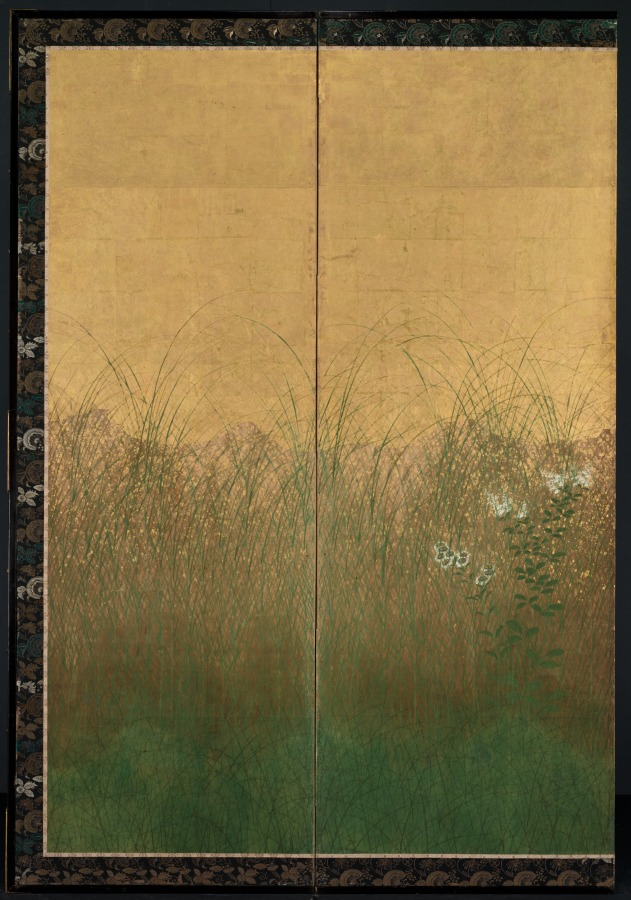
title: Autumn Evening with Full Moon on Musashino Plain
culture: Japan, Edo period (1615–1868)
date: early 1600s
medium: One of a pair of six-fold screens; ink, color, and gold and silver foil on gilded paper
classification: Painting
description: Tall grasses and autumn flowers reach out of thick green undergrowth in this depiction of the plain of Musashi, a site famous from classical Japanese poetry. A silver disc, now tarnished, represents the full moon. Flecks of cut-gold foil in the sky evoke the day’s passage into night. Once a wilderness with a vast horizon, Musashi is now densely populated.